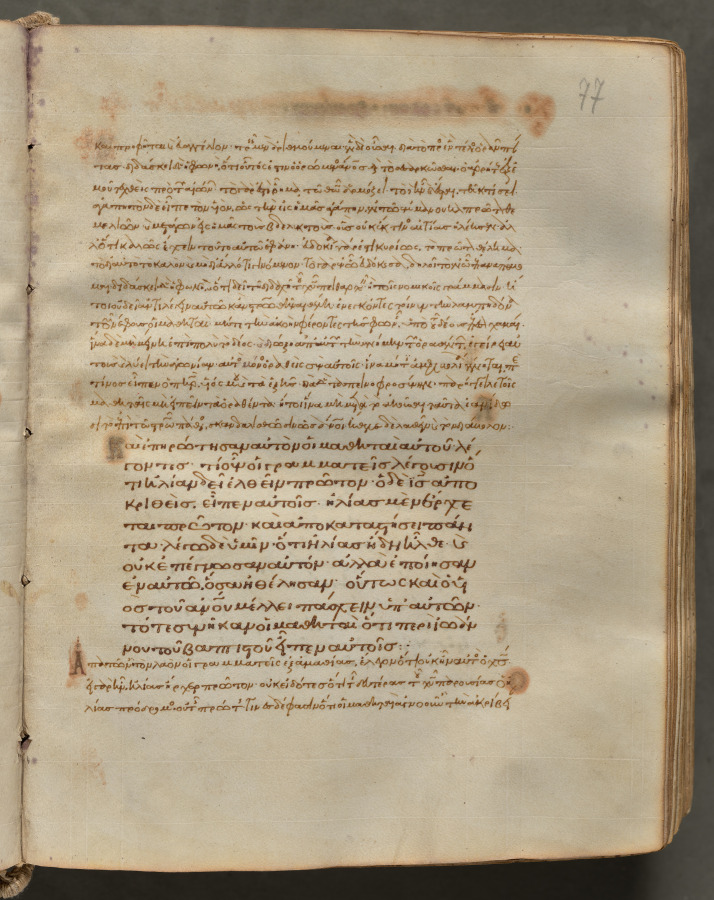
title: Text, folio 77 (recto), from a Gospel Book with Commentaries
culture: Byzantium, Constantinople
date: c. 1000–1100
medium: ink, tempera, and gold on vellum; leather binding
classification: Bound Volume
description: Each of the four gospels in this book opens on a page with brilliantly illuminated borders depicting the author of the text as well as birds-principally peacocks, symbols of the immortality of the soul-and fountains, representing the fountain of life and the salvation of the soul. This volume consists of 428 leaves with texts in Greek. Its level of sophistication suggests that it was probably written and decorated in a monastery in Constantinople.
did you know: Gospel Books were carried in procession through Byzantine churches.